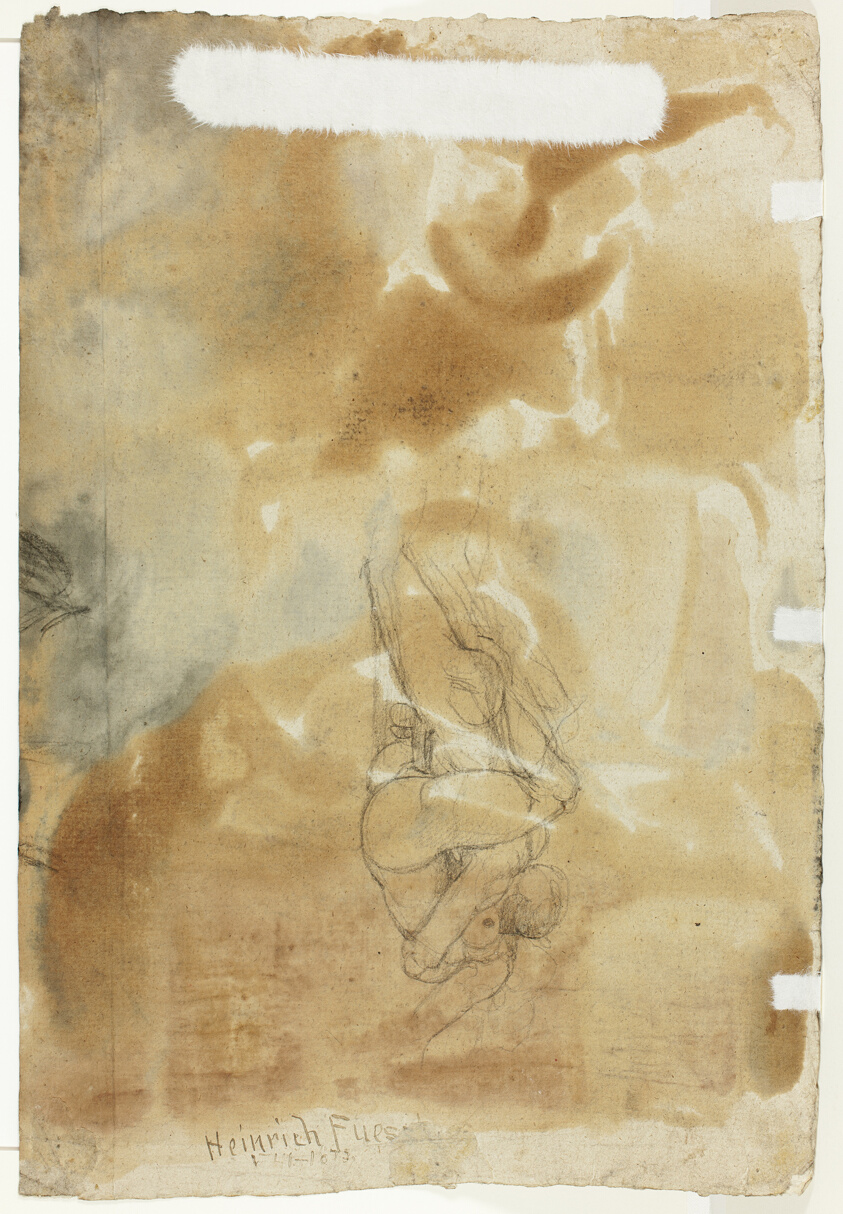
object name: Drawing and Watercolor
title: Sketch for 'Dido on the Funeral Pyre' (recto); Erotic Sketch of Man and Woman (verso)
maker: Henry Fuseli (Swiss, active in England, 1741-1825)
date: c. 1781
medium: Oil paint over charcoal (recto), and black chalk (verso), on ivory laid paper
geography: England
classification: oil on paper; drawings (visual works); prints and drawing; paper